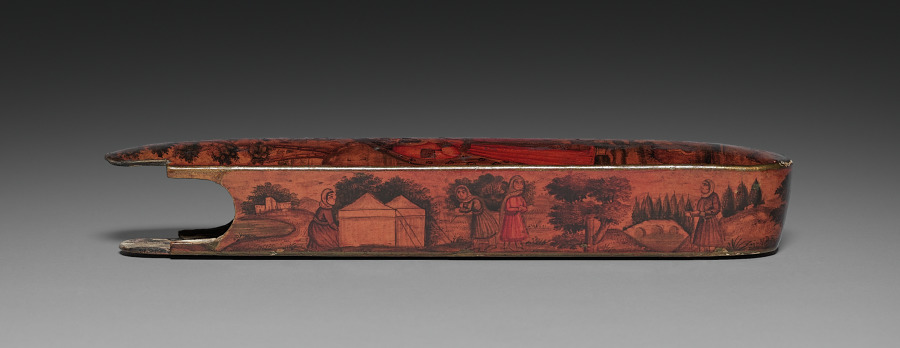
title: Pen and Ink Box (lid)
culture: Iran, Qajar period (1779-1925)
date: 1800s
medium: lacquer over papier maché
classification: Lacquer